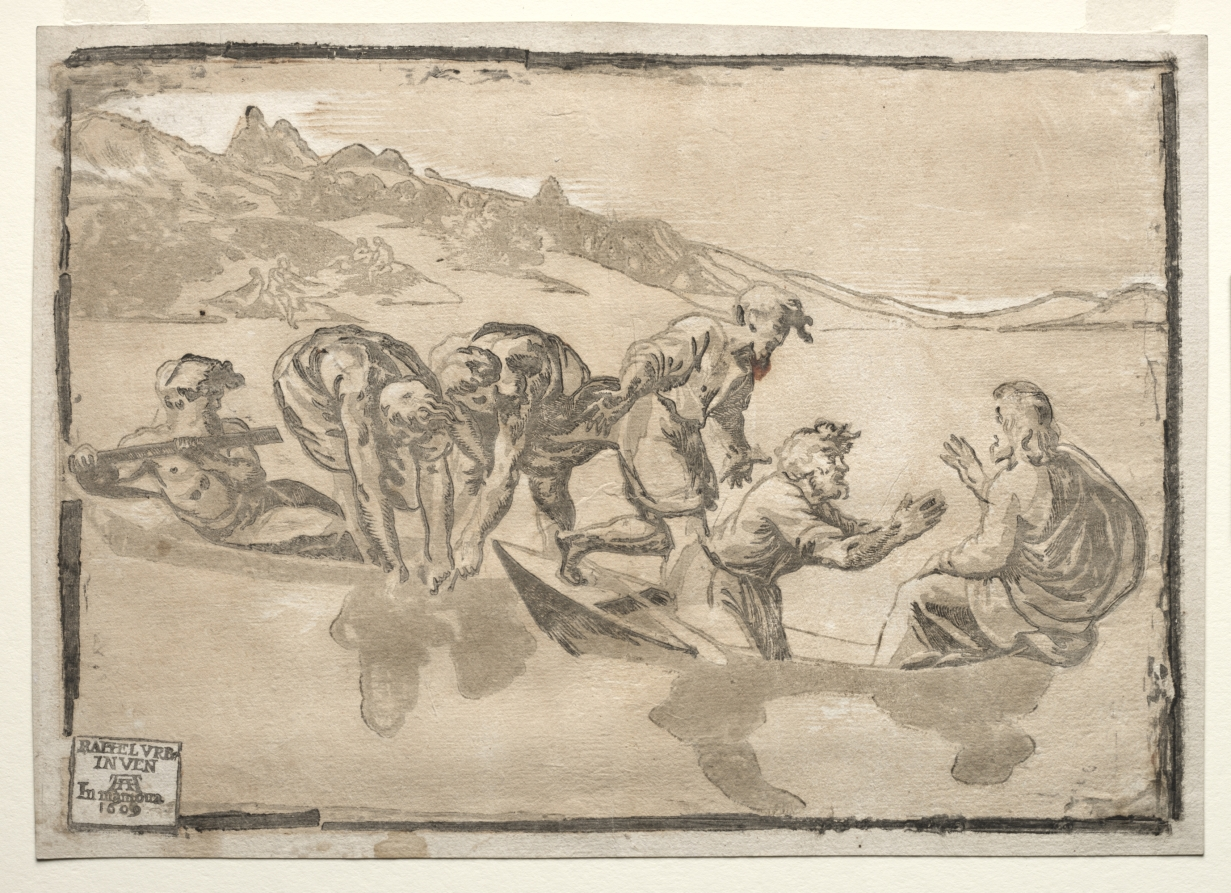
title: The Miraculous Draught of Fishes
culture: Italy, 16th century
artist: after Raphael (Italian, 1483–1520)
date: c. 1509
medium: chiaroscuro woodcut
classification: Print